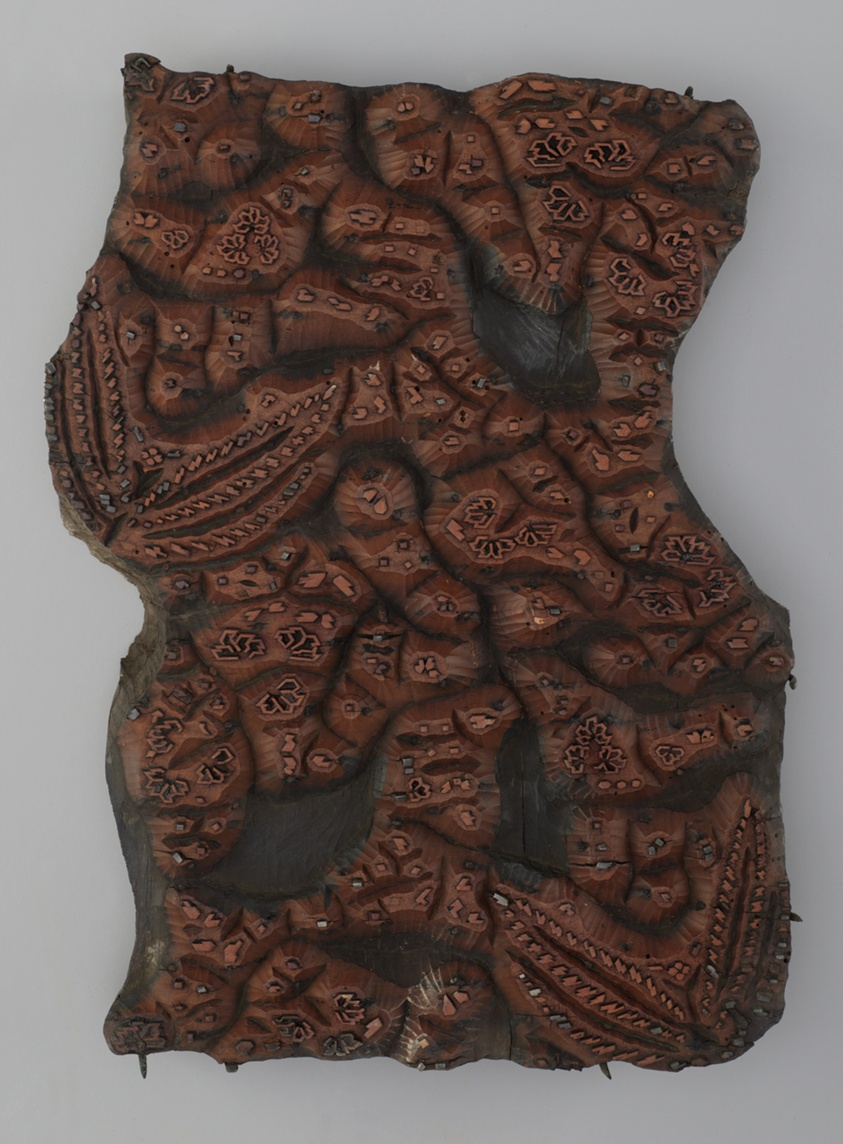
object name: Textile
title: Six Printing Blocks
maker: England or France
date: before 1850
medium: Carved wood, treated in a variety of techniques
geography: England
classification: printing blocks (printing surfaces); textile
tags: paisley